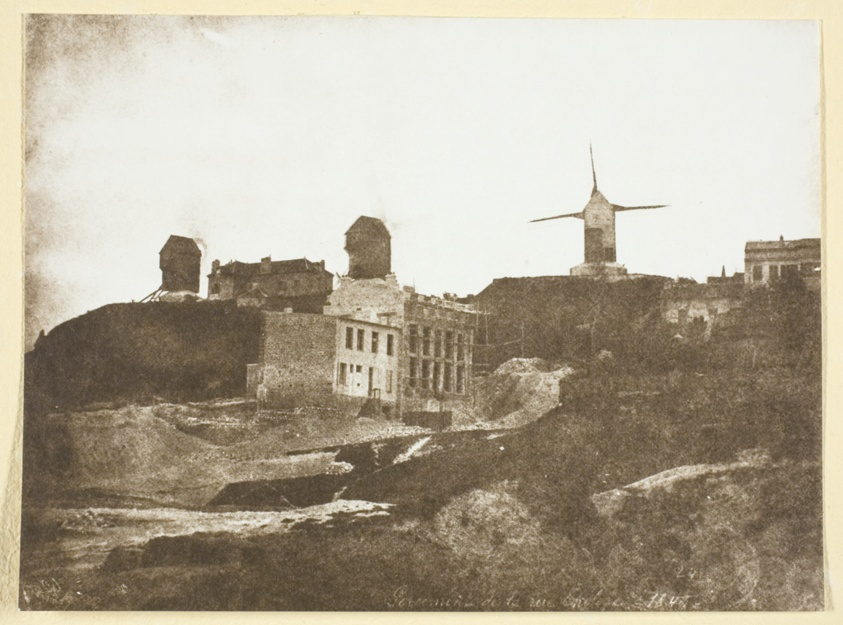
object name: Photograph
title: Moulins de Montmartre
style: 19th century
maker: Hippolyte Bayard (French, 1801–1887)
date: possibly 1842/50, printed 1965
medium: Gelatin silver print, No. 18 from the portfolio "Bayard: XXV Calotypes, 1842-1850" (1965)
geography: France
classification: photographic process; photography; photograph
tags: Collected by Hugh Edwards, Paris